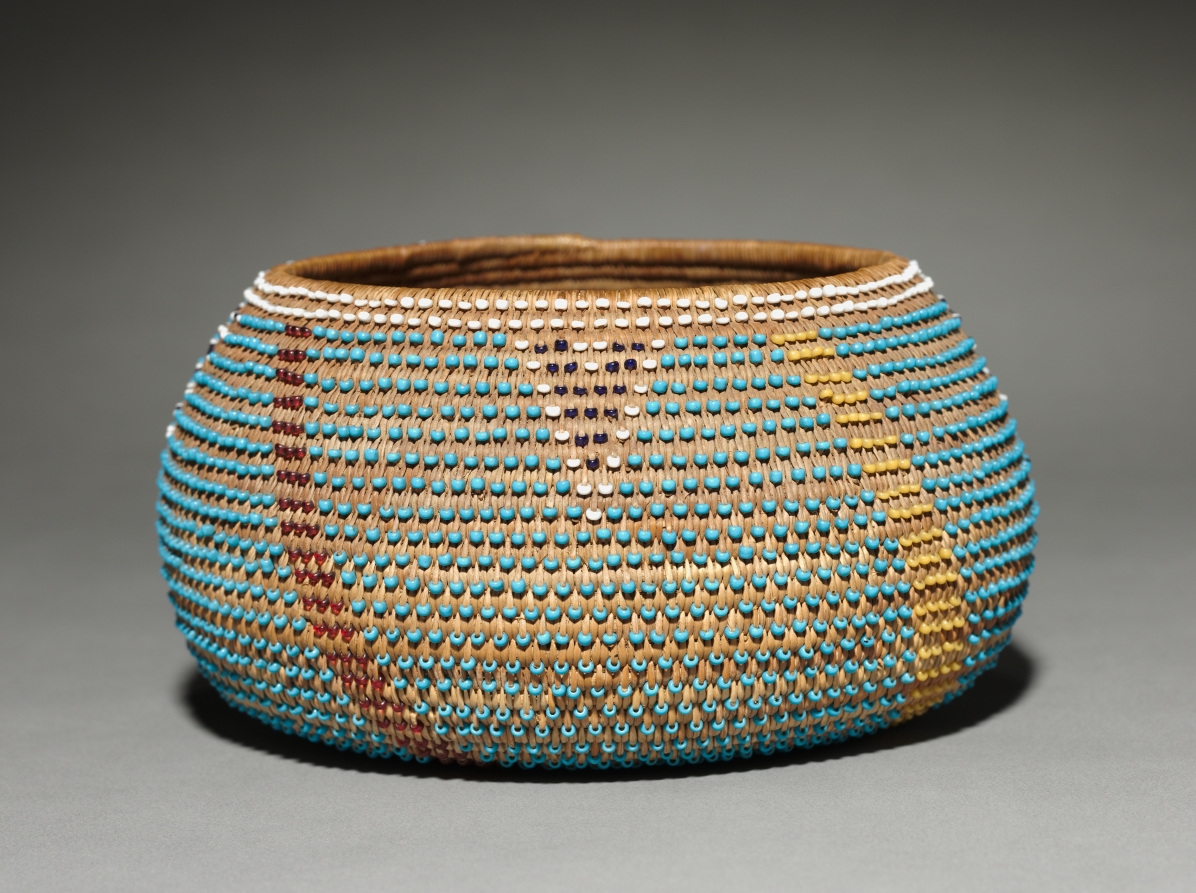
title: Gift Bowl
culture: California, Wappo, late 19th- early 20th century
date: c. 1890– 1905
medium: Sedge with beads; coiled ( 3 rods)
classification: Basketry